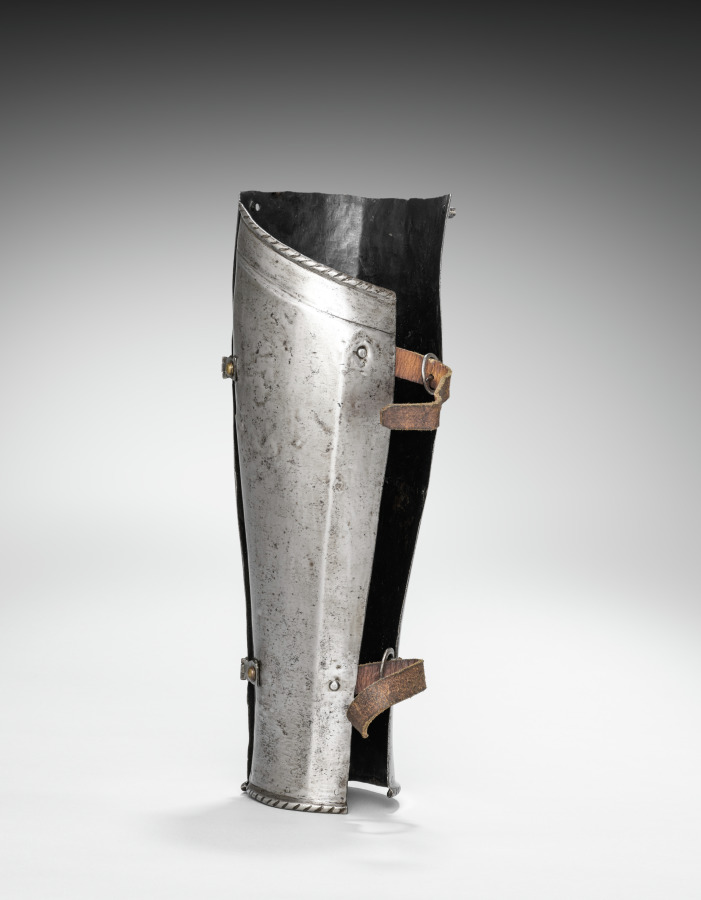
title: Proper Left Greave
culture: South Germany, 16th century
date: c. 1560–80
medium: steel, leather straps, brass rivets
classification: Arms and Armor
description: This armor was developed for the joust-a sporting combat between two mounted contestants. Although all of the elements of this armor date from the same period, they are not all from the same suit. This armor is thus called "composed." It also shows the asymmetry of jousting armor. The participants rode along a wall-like barrier known as a "tilt" with their left sides facing one another. Consequently, armor on that side of the body had to be thicker. Note the large plate (grandguard) over the left shoulder for extra protection. Also, the breathing holes in the helmet were placed on the right side (farthest from an opponent's lance) to avoid injuries from splinters. The bracket attached to the right breastplate is called the lance-rest, a shock-absorbing support designed to accommodate the lance when "couched" under the right armpit.